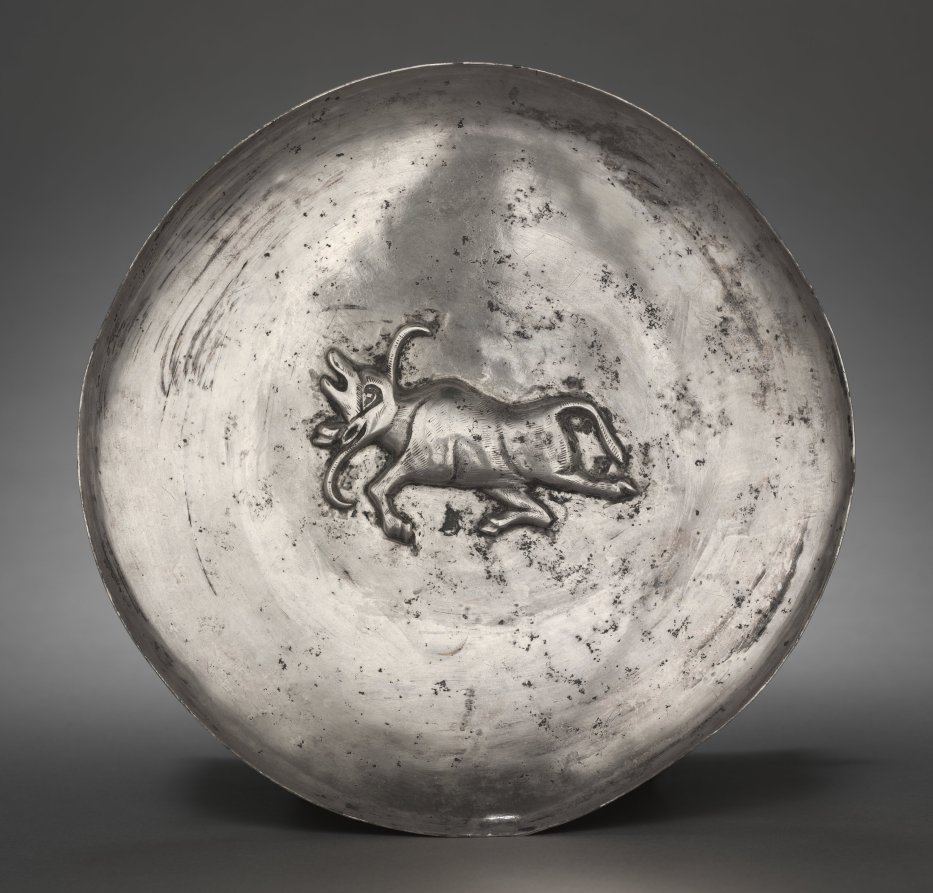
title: Silver Dish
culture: Iran, Sasanian Empire (224–651 CE)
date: 226–641 CE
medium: silver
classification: Metalwork